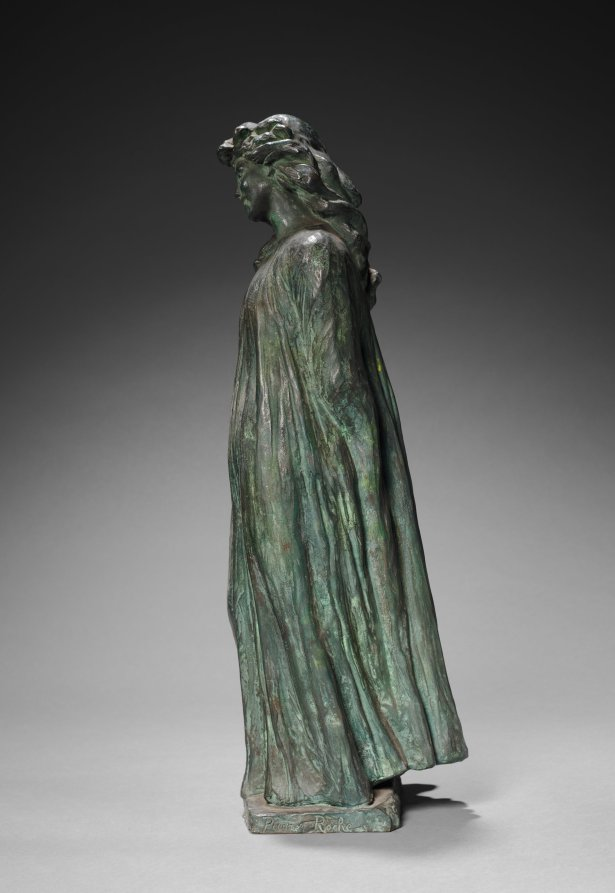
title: Loïe Fuller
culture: France, 19th-20th century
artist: Pierre Roche (French, 1855–1922)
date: c. 1900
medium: bronze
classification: Sculpture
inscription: Inscribed on the face of the base: "Loïe Fuller" and at the right, signature of the artist